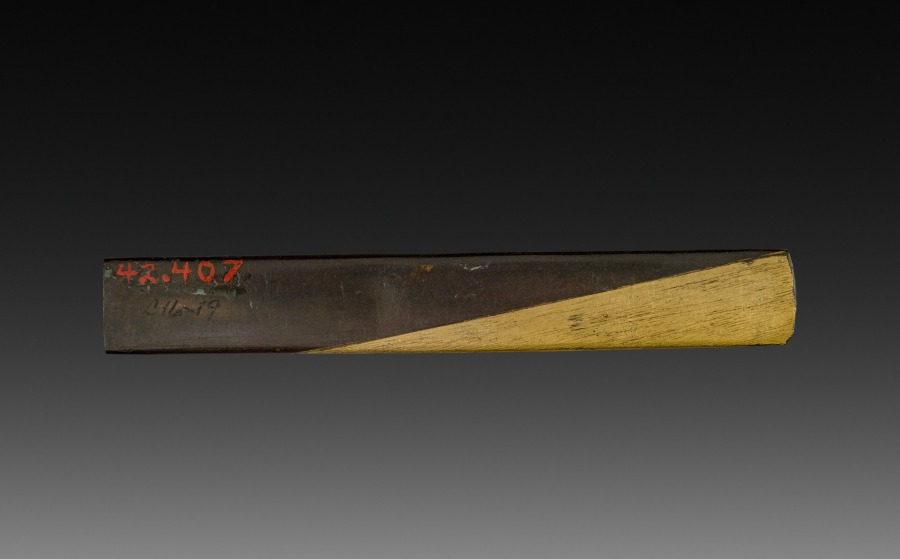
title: Knife Handle (Kozuka)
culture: Japan, Edo period (1615–1868)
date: early to mid-1800s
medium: inlaid bronze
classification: Metalwork